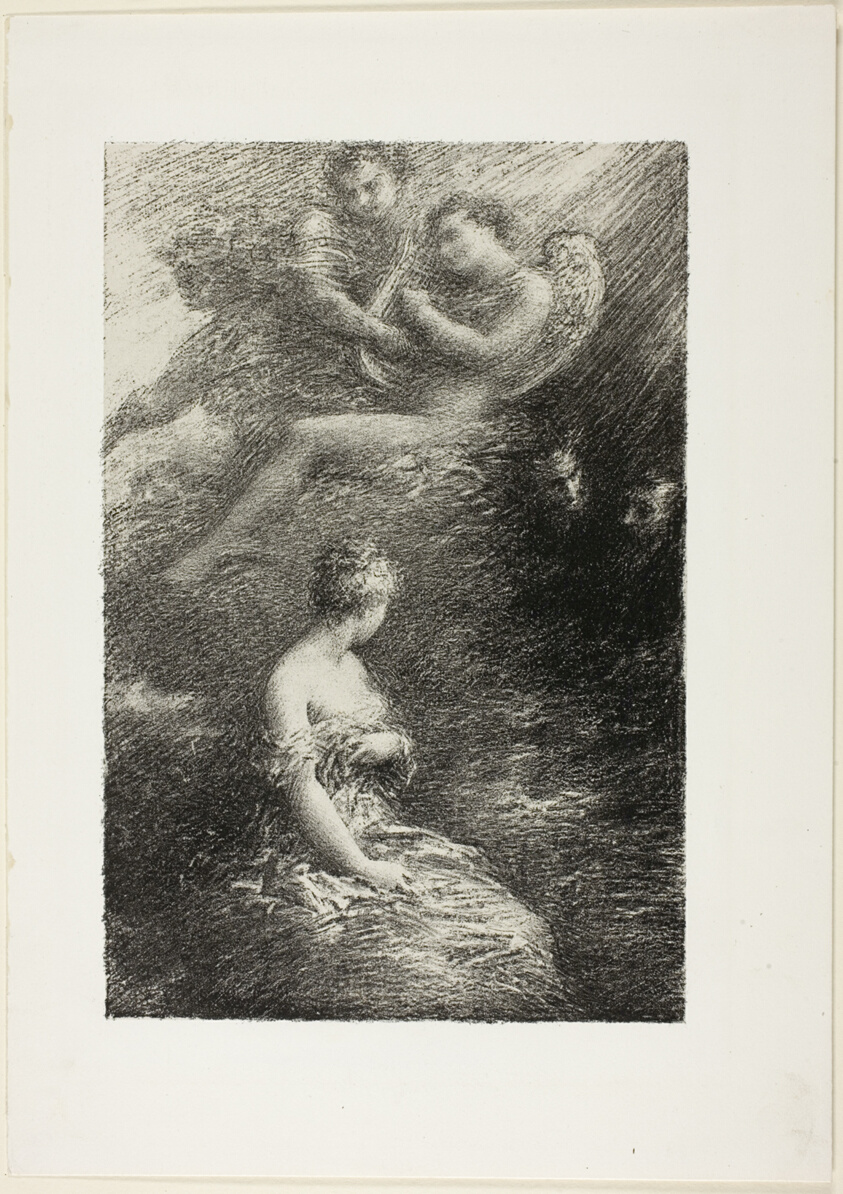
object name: Print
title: The Damnation of Faust: The Appearance of Marguerite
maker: Henri Fantin-Latour (French, 1836-1904)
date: 1888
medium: Lithograph in black with scraping on stone on grayish-ivory china paper laid down on ivory wove paper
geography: France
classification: lithograph; print; prints and drawing